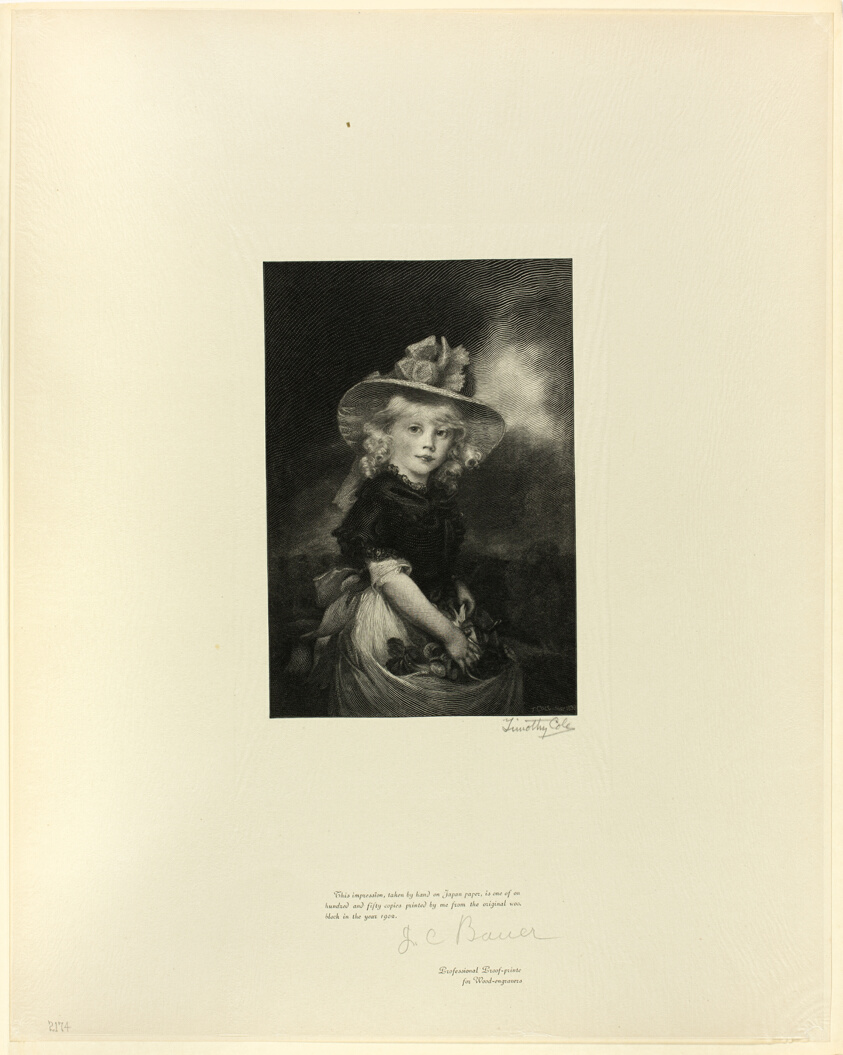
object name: Print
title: Princess Sophia, Daughter of George III, from Old English Masters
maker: Timothy Cole (American, born England, 1852-1931); after John Hoppner (English, 1758-1810)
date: 1898, printed 1902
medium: Wood engraving on chine paper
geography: United States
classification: wood engraving; print; prints and drawing